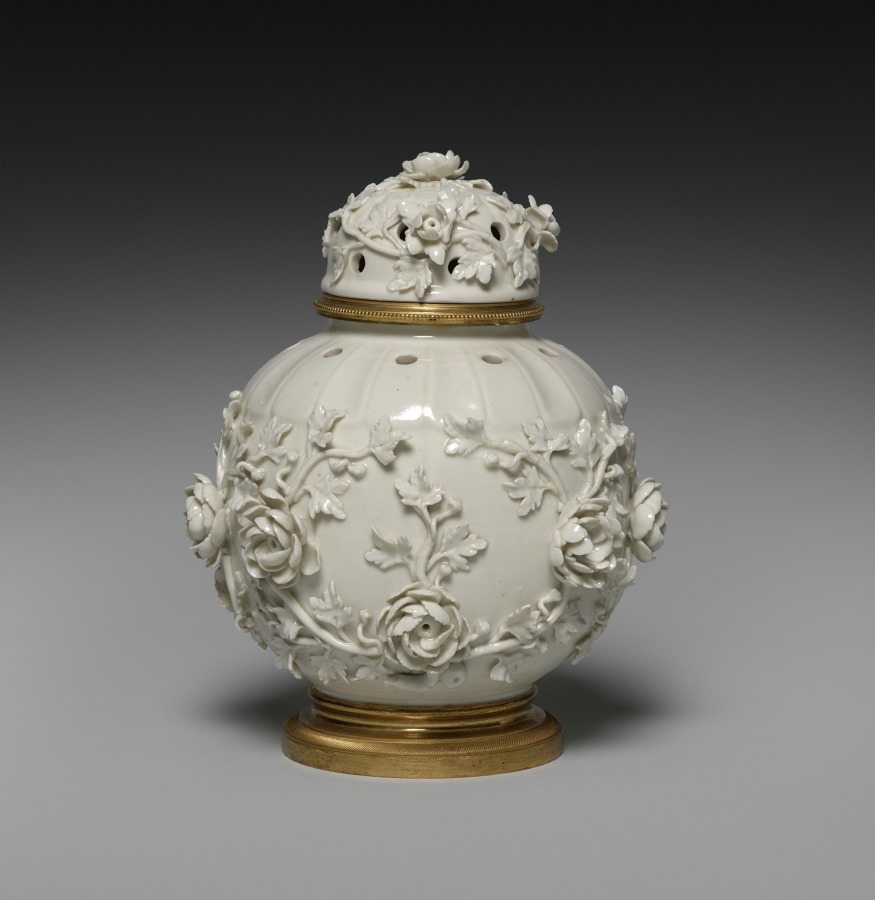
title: Potpourri Vase with Cover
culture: France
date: c. 1860–80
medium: blanc-de-chine porcelain; gilt bronze mount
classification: Ceramic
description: This vase was likely made by the celebrated Parisian ceramics firm of Edmé Samson (1810–91). To cater to the resurgence in taste for 18th-century designs, the Samson firm specialized in making reproductions of rare 18th-century European porcelains, especially those from firms that had already copied Chinese porcelains. In this case, this vase's design is taken from models produced by the Saint-Cloud factory in the 1750s after earlier Qing dynasty Chinese ceramics. However, the telltale sign that this vase is made by Samson and not Saint-Cloud is that the original would have been made from a soft-paste porcelain (fired at a lower temperature), while this example is made of hard-paste porcelain (fired at the highest temperature).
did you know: Potpourri vases always have holes in the top to let the scent of dried spices and flowers contained within freshen the air around them.